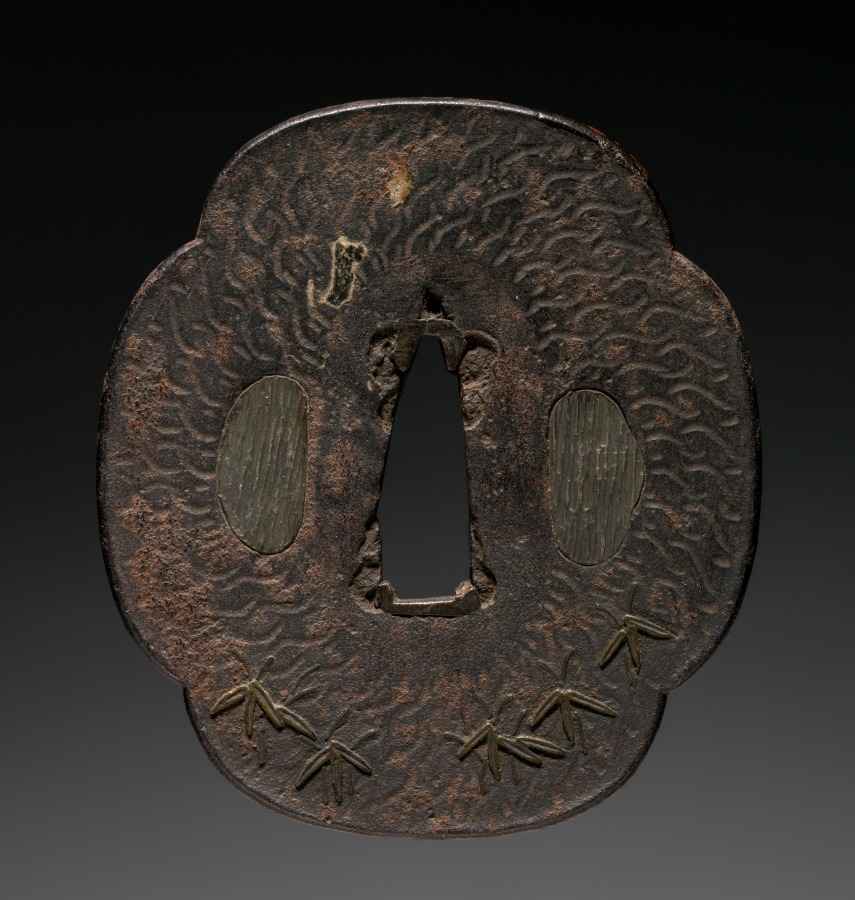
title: Sword Guard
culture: Japan, Edo period (1615–1868)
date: early to mid-1800s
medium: iron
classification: Arms and Armor